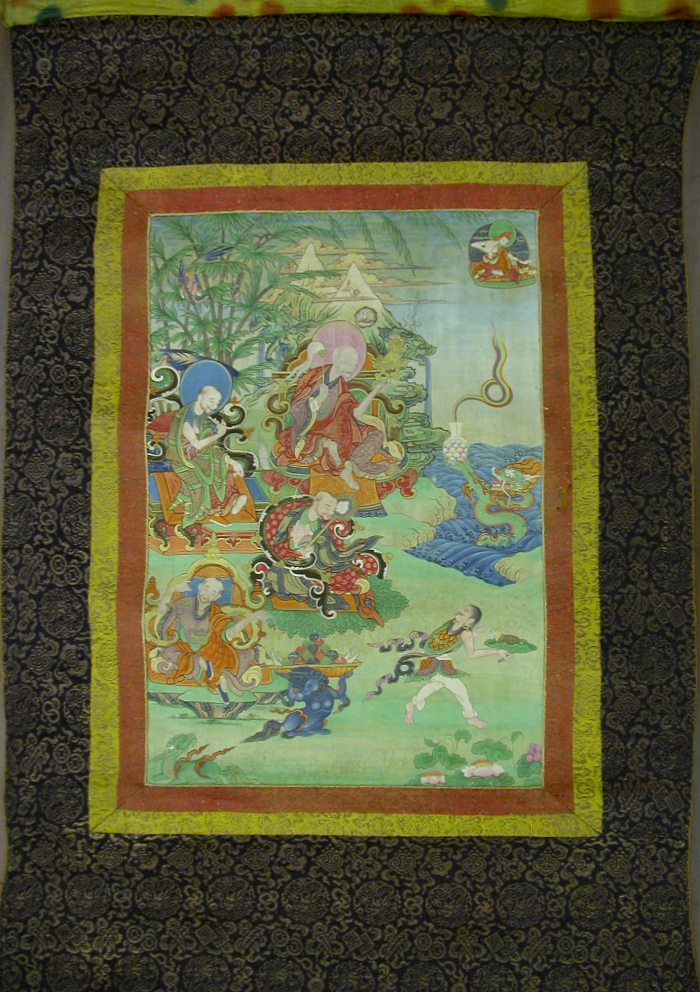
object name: Painting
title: Painted Banner (Thangka) from a Set of Seven Honoring Gayadhara, a Sakya Pandit from India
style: Himalayan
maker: Tibet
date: 19th century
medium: Pigment on cloth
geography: Tibet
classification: hanging scroll; asian art; painting